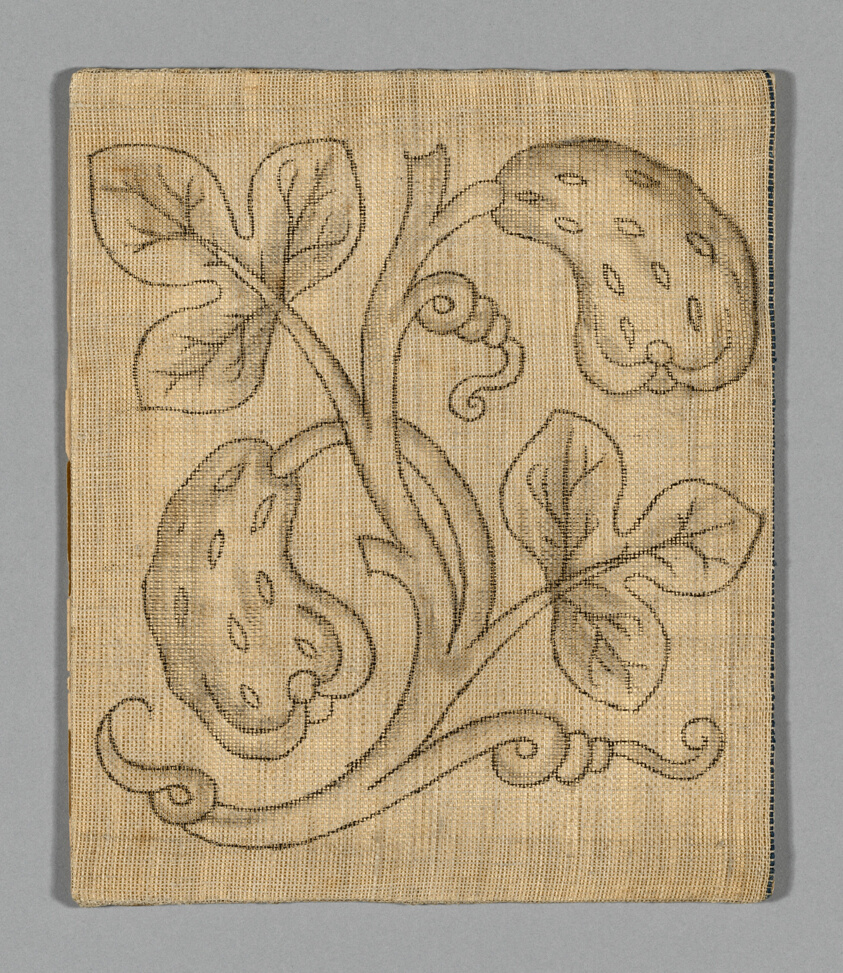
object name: Textile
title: Slip (Unfinished)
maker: England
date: 1590/1640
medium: Linen, plain weave with drawing in pencil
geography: Southern England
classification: textile; needlework (visual works); accessories (object genre); patterns (guides)